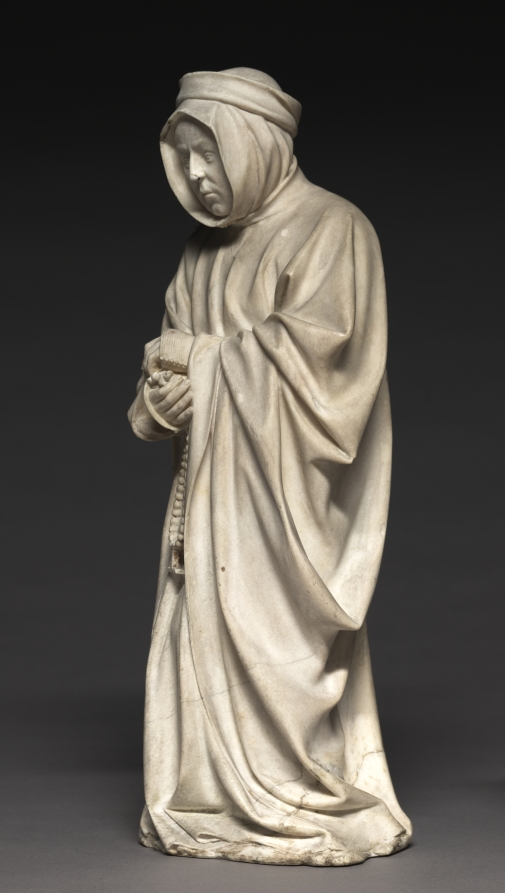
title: Mourner from the Tomb of Philip the Bold, Duke of Burgundy (1364–1404)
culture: Netherlands, active Dijon, 15th century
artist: Claus de Werve (Netherlandish, 1380–1439)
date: 1404–1410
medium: vizille alabaster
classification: Sculpture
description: This figure comes from the tomb of Duke Philip the Bold from the church of Champmol near Dijon (Burgundy, France). Philip, who founded the monastery and designated it as his burial place, hired the best artists, many of whom came from the Netherlands. While the commission was given in 1381, the work was not completed until 1410, six years after the duke’s death. This mourner is unusual for the time because it is not carved as a static low relief on the pedestal of the tomb but interacts with the viewers and their fellow procession members. The lifelike quality of the figure is due in large part to the alabaster. Its softness allowed artists to carve details into the material, and the transparent, milky white stone could also be polished to a high gloss.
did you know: During his life, Duke Philip founded the monastery of Chartreuse de Champmol to serve as a final resting place for himself and his family.